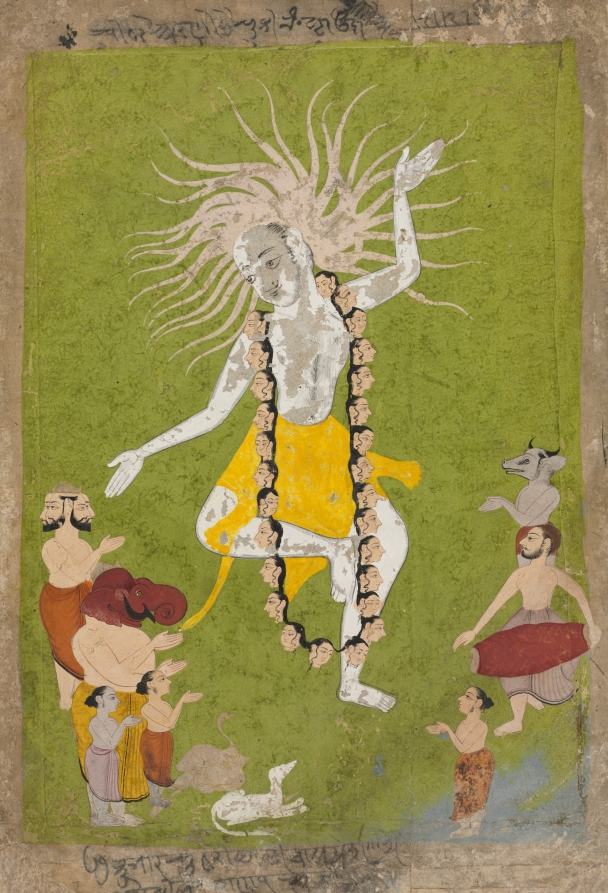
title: God Shiva in His Ferocious Aspect as Mahakala Dancing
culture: Northwestern India, Rajasthan, Rajput Kingdom of Mewar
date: c. 1700–1710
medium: Gum tempera and ink on paper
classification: Painting